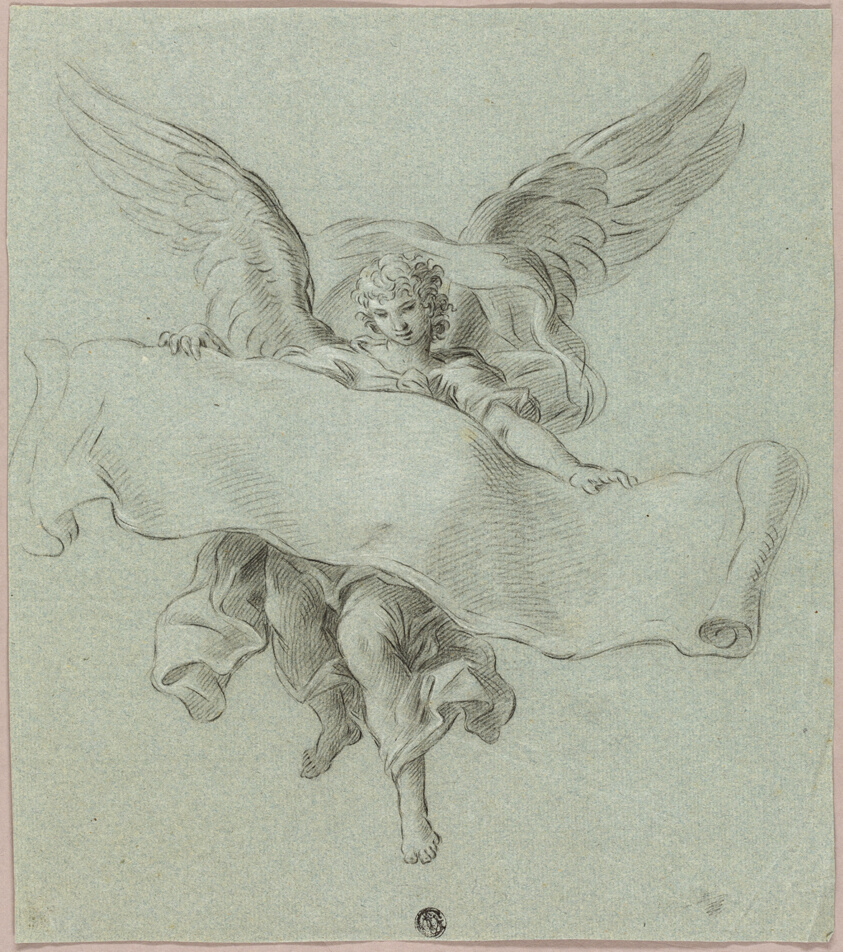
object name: Drawing and Watercolor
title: Angel with Scroll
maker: Attributed to Sebastiano Conca; Italian, 1680-1764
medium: Black chalk, heightened with white chalk, on blue laid paper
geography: Italy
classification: chalk; paper; drawings (visual works); prints and drawing